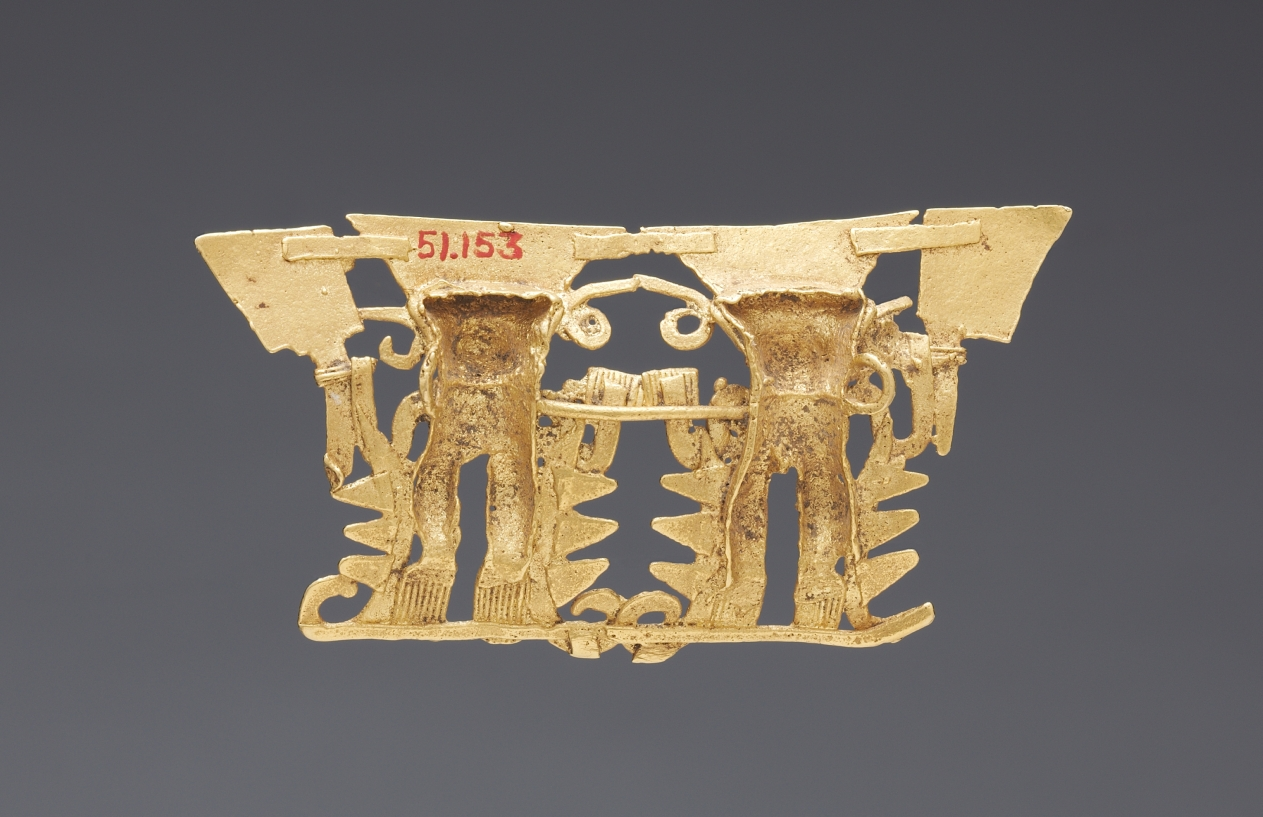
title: Bat-Nosed Figures Pendant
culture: Panama, Azuero Peninsula, Parita style, 11th-16th century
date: 1000–1550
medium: cast gold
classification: Metalwork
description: Both pendants depict paired figures with tusklike noses. The "tusks" perhaps refer to the upswept nose of the leaf-nosed bat, an agile hunter whose "leaf" helps it to snatch prey from midair. The bat's success as a hunter is part of the reason that some identify such paired figures as warriors. They each hold a paddle-shaped object; the larger pair, in elaborate costumes, also clutches staffs.